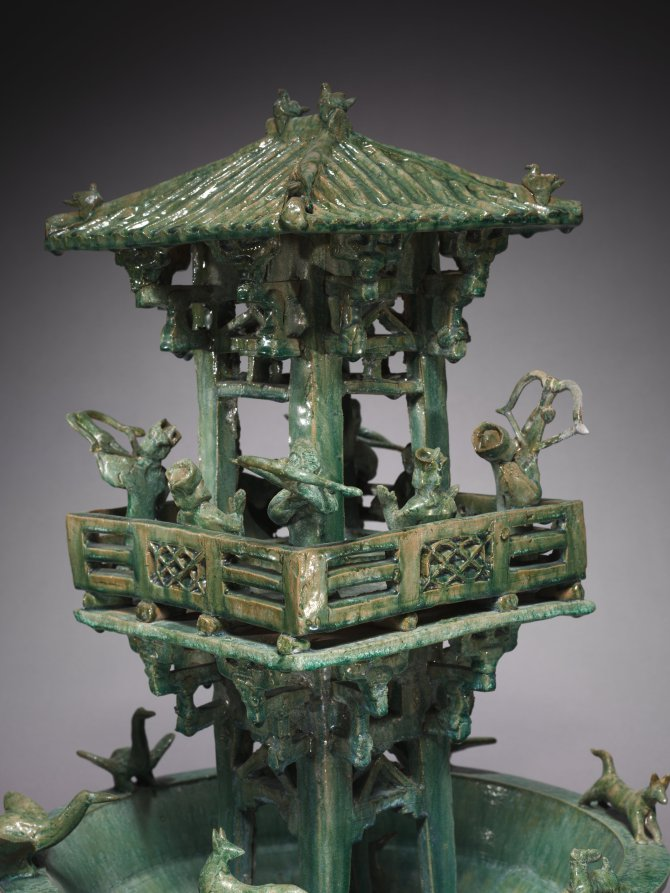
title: Watchtower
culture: China, Eastern Han dynasty (25–220 CE)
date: 25–220 CE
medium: earthenware with lead glaze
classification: Ceramic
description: In this funerary sculpture of the watchtower is a lively retinue of hunters, musicians, dancers, and domestic animals. The representation provides a vivid picture of the worldly enjoyment to be perpetuated in the otherworldly realm of the afterlife. A low-temperature lead glaze is applied to its earthenware body, enhancing the modeled forms with a brilliant, smooth coating like a layer of opaque glass.